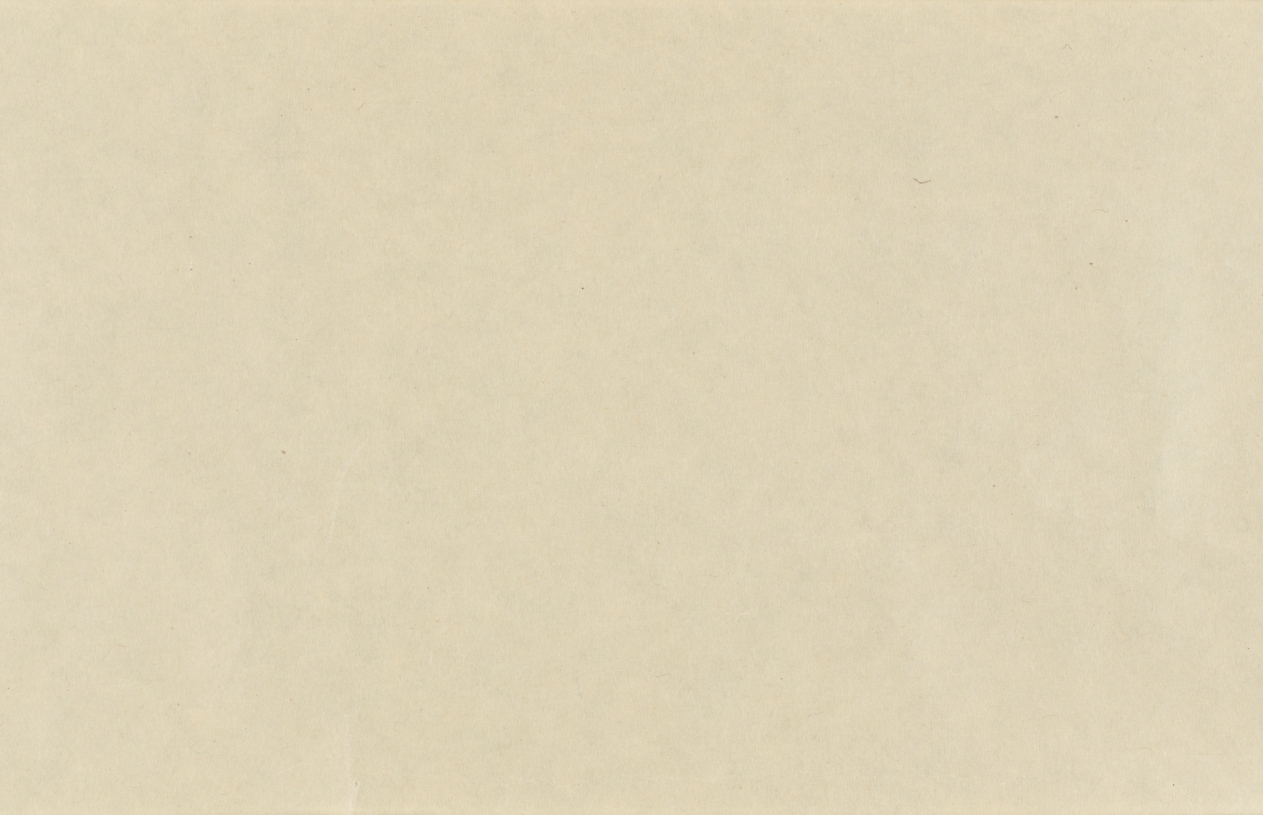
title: Eight Views of Xiao-Xiang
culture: Japan, Muromachi period (1392–1573)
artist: Sesson Shūkei (Japanese, c. 1492–c. 1577)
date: 1500s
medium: handscroll; ink on paper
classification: Painting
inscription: Signature and seal of artist at end of painting.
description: Eight Views of the Xiao and Xiang Rivers can be traced to 11th-century Chinese poems and paintings, the depiction of which had also become popular among Korean and Japanese painters. Xiao-Xiang refers to the region in present-day Hunan province where the Xiao and Xiang rivers converge. Few painters of the Eight Views had in fact seen the scenery; rather, they were trying to portray in ink and wash the lyrical qualities of dim light and a misty atmosphere typical of that region. Each of the poetic titles suggests a time of day, a season, or specific atmospheric conditions—subjects that challenged the abilities of the most talented artists. In this miniature painting (shukuzu) of the Muromachi period, Japanese Zen monk and painter Shukei Sesson depicted all eight views featured in Chinese prototypes: Wild Geese Descending to Sandbar; Returning Sails Off a Distant Coast; Mountain Market in Clearing Mist; River and Sky in Evening Snow; Autumn Moon over Dongting Lake; Night Rain on the Xiao and Xiang; Evening Bell from Mist-Shrouded Temple; and Fishing Village in Evening Glow.